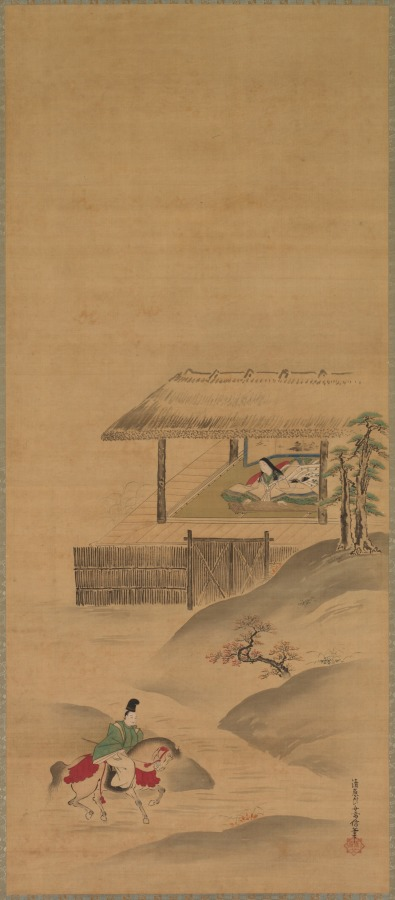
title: Minamoto no Nakakuni Visits Lady Kogō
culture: Japan, Edo period (1615–1868)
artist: Kiyohara Yukinobu (Japanese, 1643–1682)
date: late 1600s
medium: One of a triptych of hanging scrolls; ink and color on silk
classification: Painting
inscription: 款記「清原氏女雪信筆」/「清原女」朱文八角印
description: Kiyohara Yukinobu was one of Japan's earliest and most talented female painters. Kiyohara preferred Japanese style painting techniques and subjects. Her work depicts the scenery and history of her native land. In addition to the tonalities of ink, she applied a delicate range of colors. These help identify the seasons, an important theme in Japanese life and culture.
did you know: This central painting from a triptych presents an episode from The Tale of the Heike in which Minamoto no Nakakuni is sent by the emperor to look for Lady Kogō.